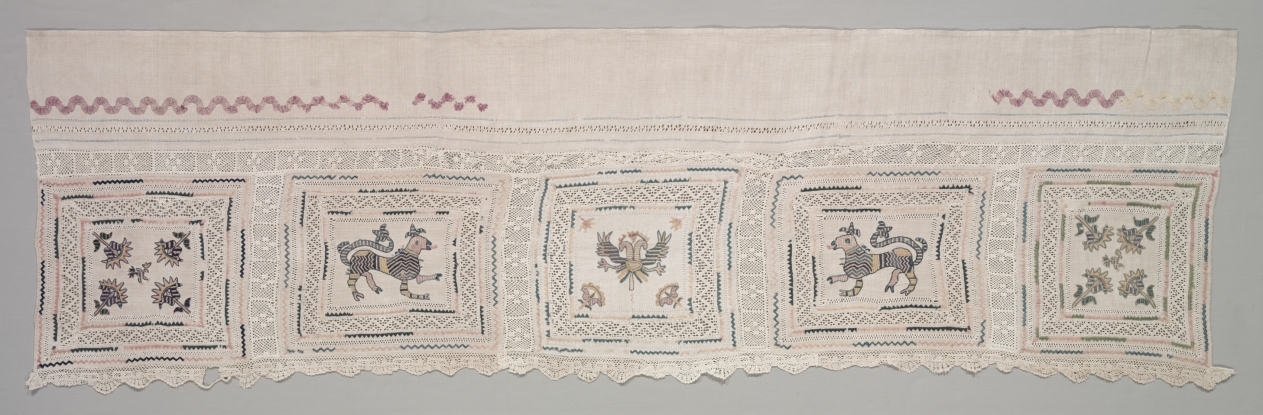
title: Runner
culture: Russia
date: c. 1800s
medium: embroidered linen, ribbon appliqué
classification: Embroidery